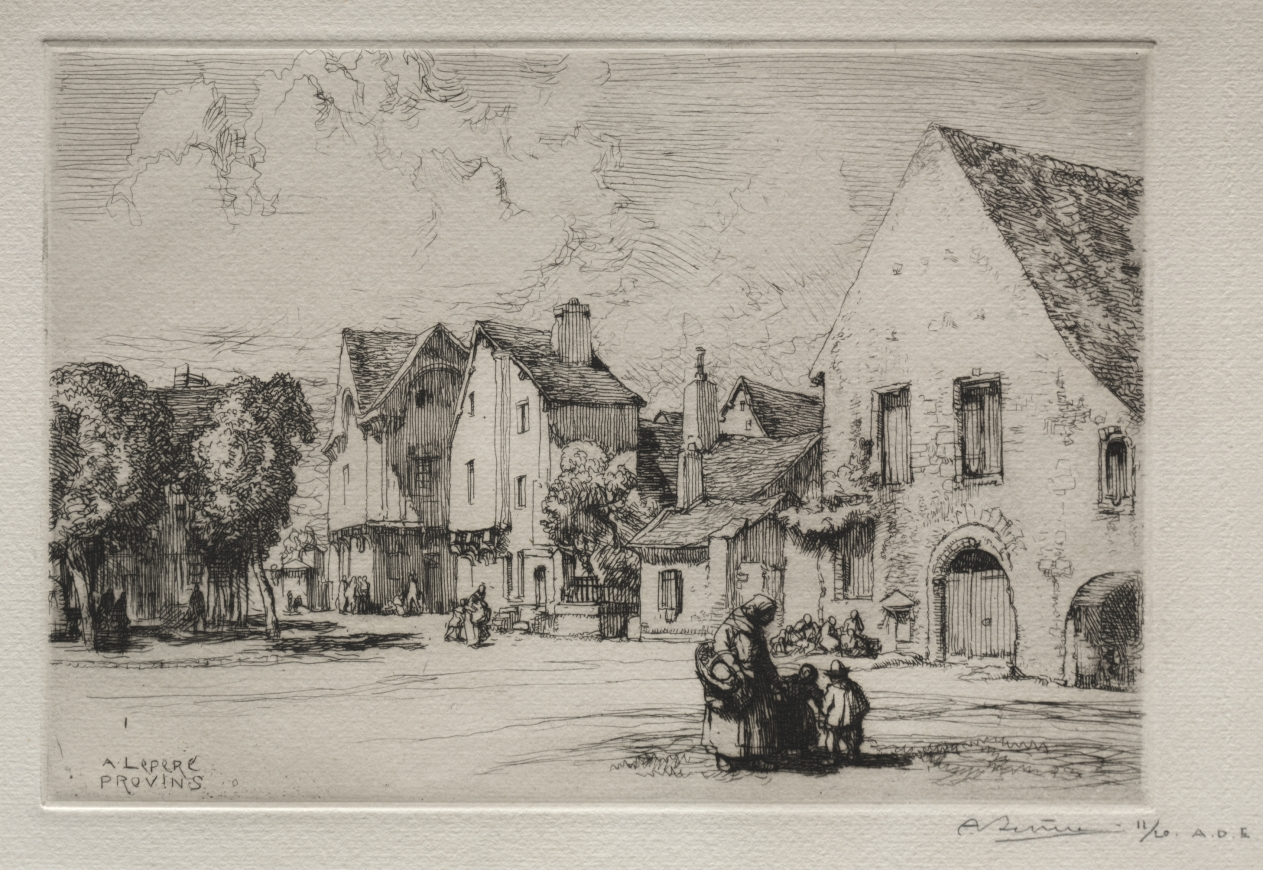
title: Provins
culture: France, late 19th-early 20th century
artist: Auguste Louis Lepère (French, 1849–1918)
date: 1910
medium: etching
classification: Print